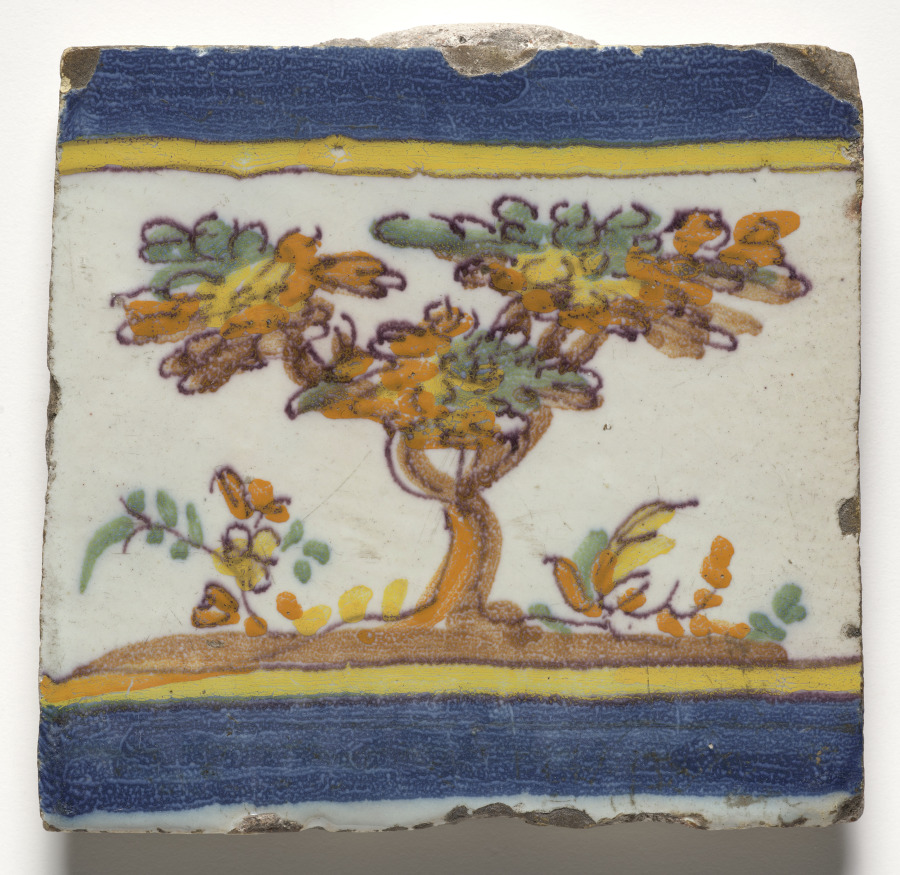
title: Wall Tile–Tree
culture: Spain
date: c. 1600s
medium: glazed ceramic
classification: Ceramic